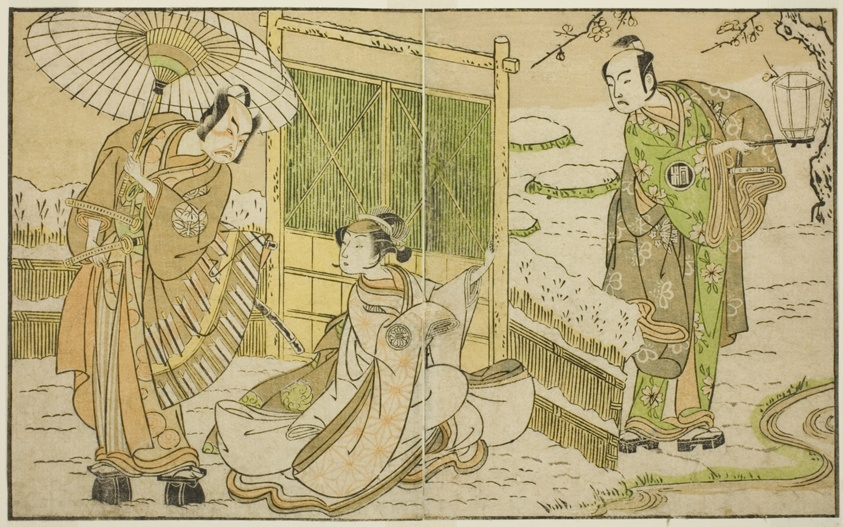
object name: Print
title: The Actors Arashi Sangoro II as Minamoto no Yoritomo (right), Segawa Kikunojo II as Yuki Onna (center), and Ichimura Uzaemon IX as Kajiwara Genta no Kagetoki, in the Play Myoto-giku Izu no Kisewata, Performed at the Ichimura Theater in the Eleventh Month, 1770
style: Japanese (culture or style)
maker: Katsukawa Shunsho 勝川 春章; Japanese, 1726-1792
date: c. 1772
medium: Color woodblock print; from the illustrated book Yakusha Kuni no Hana (Prominent Actors of Japan)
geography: Japan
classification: woodblock print; print; asian art